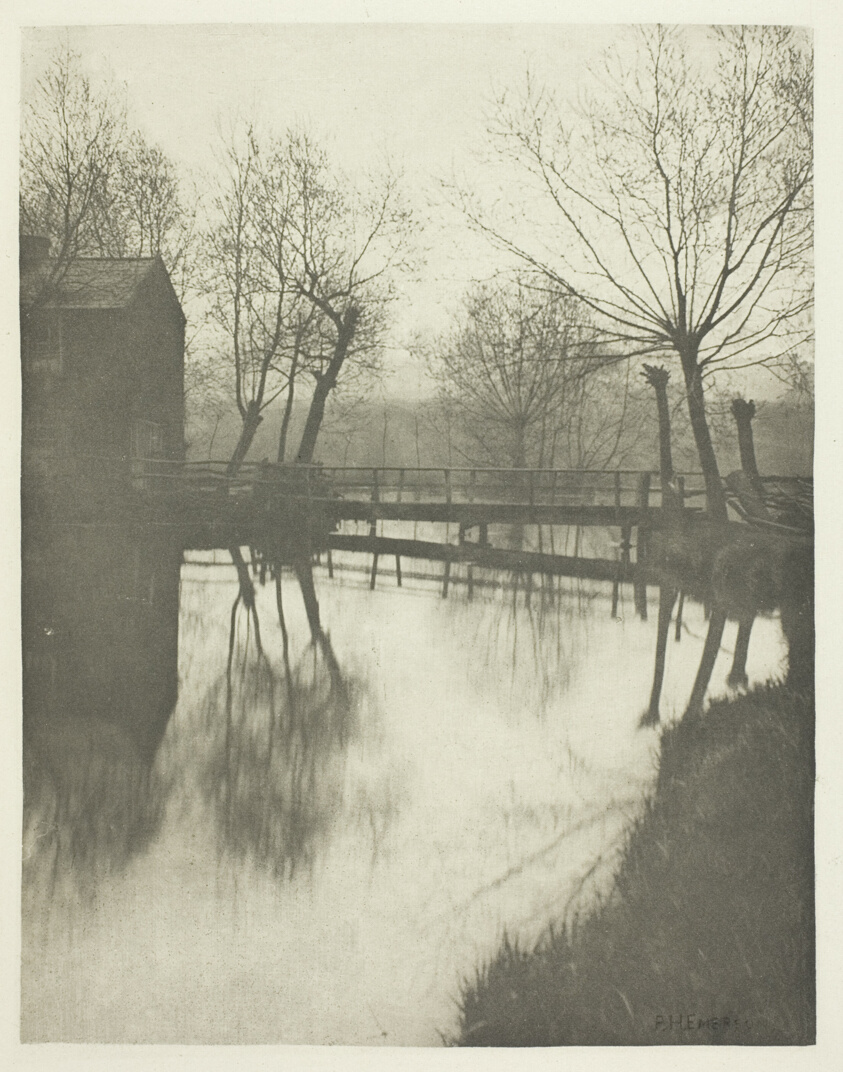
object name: Photograph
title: Footbridge Near Chingford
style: 19th century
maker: Peter Henry Emerson (English, born Cuba, 1856–1936)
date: 1880s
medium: Photogravure, plate XXV from the album "The Compleat Angler or the Contemplative Man's Recreation, Volume II" (1888)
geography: England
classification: photogravure; photomechanical process; photography; photograph